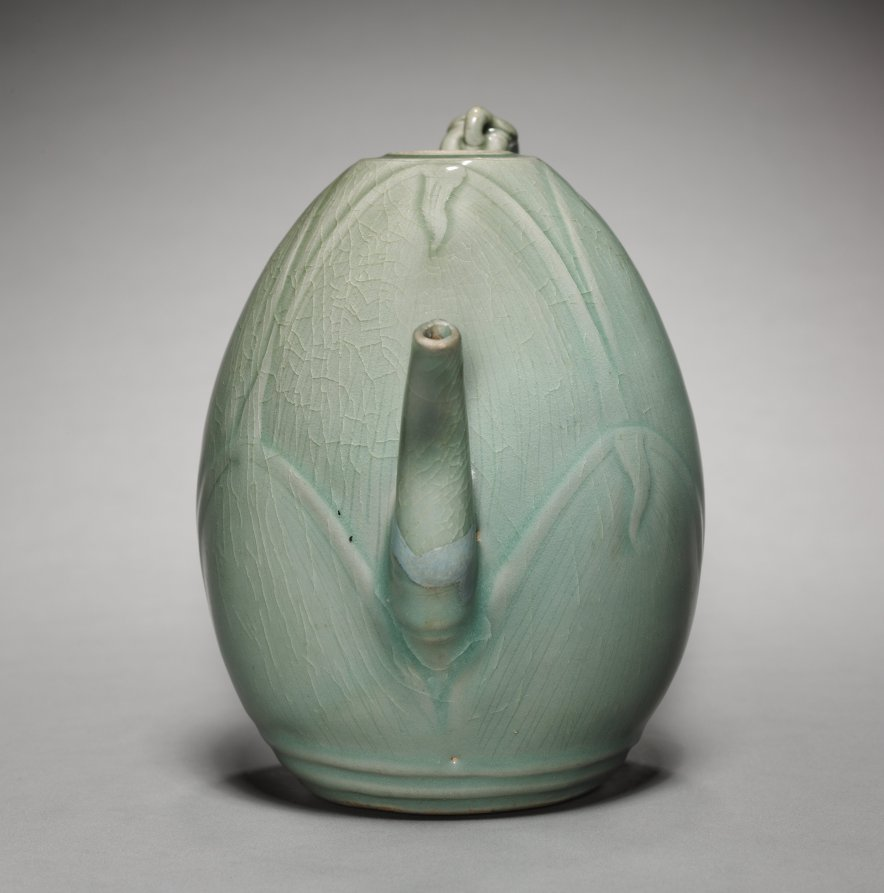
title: Wine Ewer with Incised Bamboo Shoot Design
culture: Korea, Goryeo dynasty (918–1392)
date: 1100s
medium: celadon ware with incised decoration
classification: Ceramic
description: Natural motifs inspired the shape of celadon vessels as well as their inlaid designs in the Goryeo period. This wine ewer is shaped like a bamboo shoot, but it also resembles a lotus bud. Even though the spout was repaired, the ewer is a masterpiece of Goryeo period celadon. Ewers of the same shape are now housed at the National Museum of Korea and the Museum of Oriental Ceramics, Osaka.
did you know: This type of ewer is supposed to have a tight-fitting lid, which is currently missing.